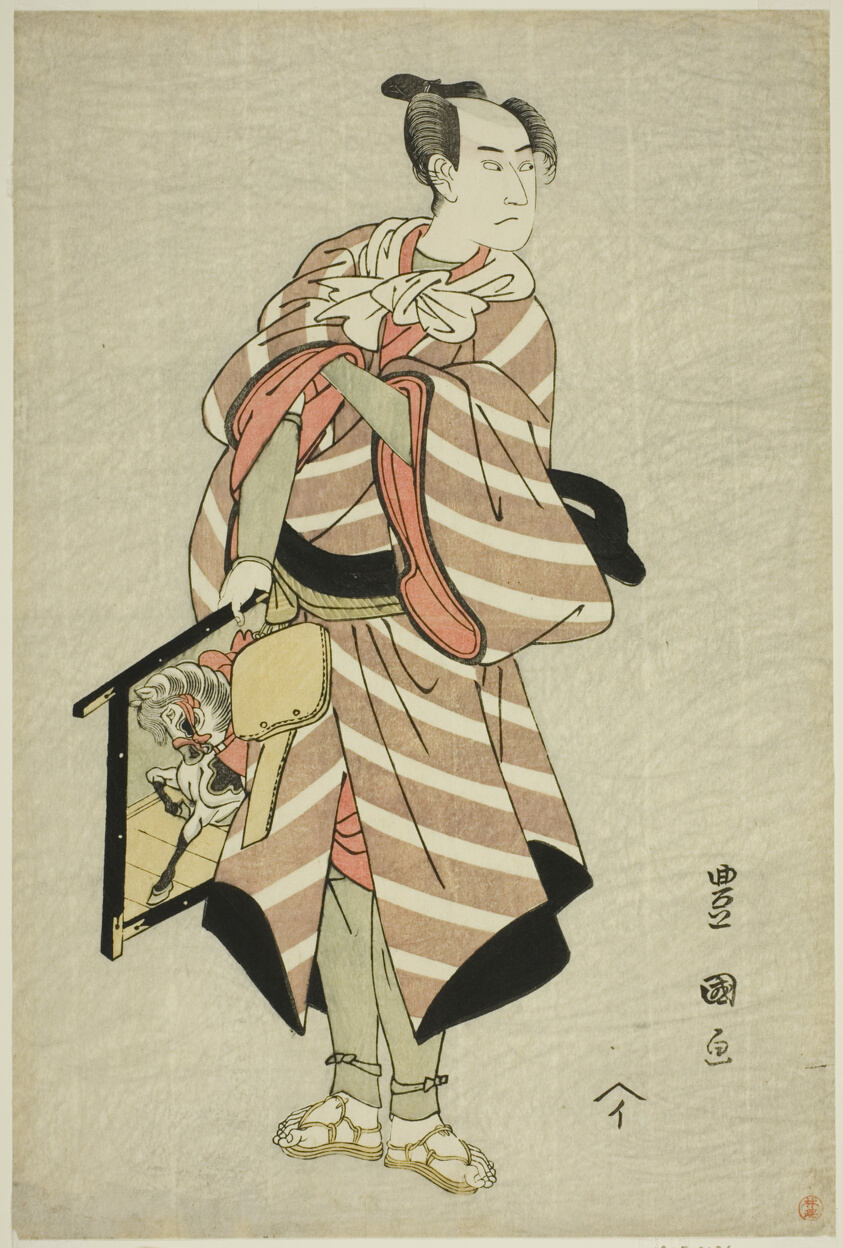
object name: Print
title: The actor Sawamura Sojuro III as the packhorse-man Muchizo in the play "Miyamairi Musubi no Kamigaki," performed at the Kiri Theater in the eleventh month, 1797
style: Japanese (culture or style)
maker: Utagawa Toyokuni I 初代 歌川 豊国; Japanese, 1769–1825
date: c. 1797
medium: Color woodblock print; oban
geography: Japan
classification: woodblock print; print; asian art